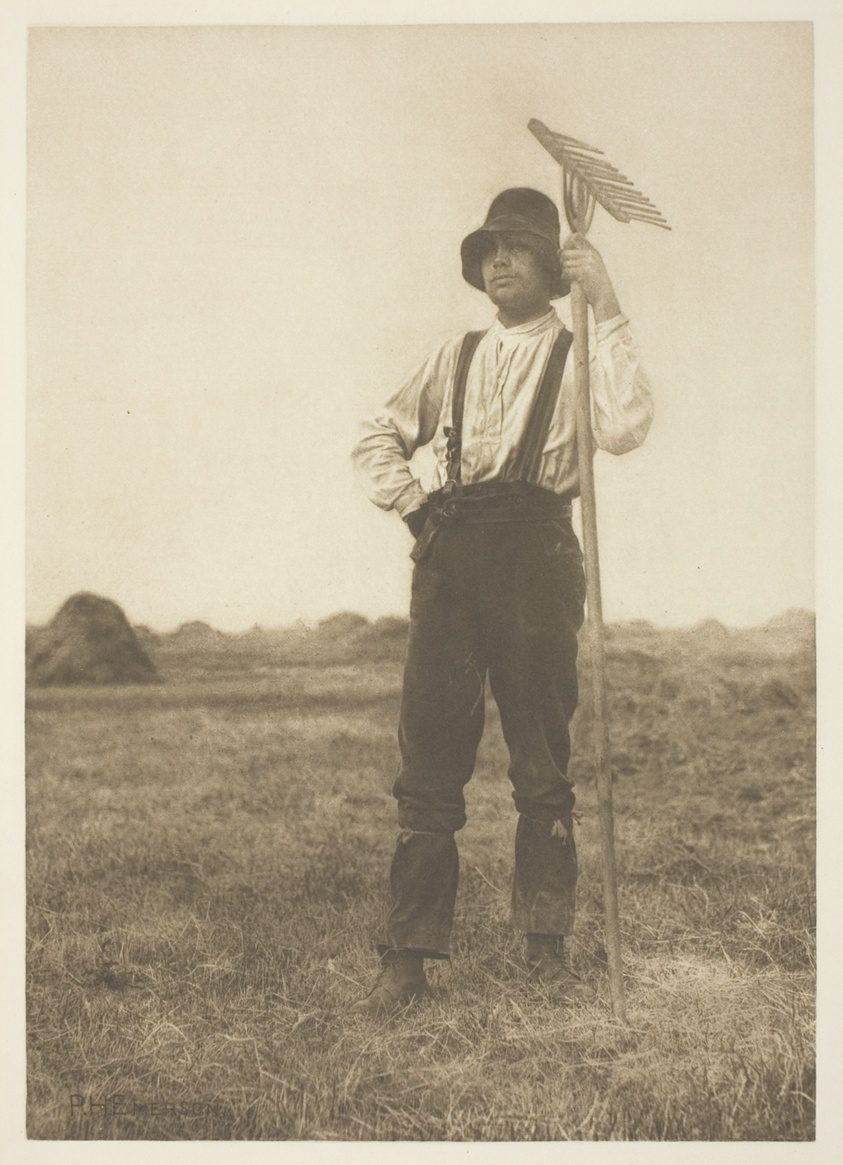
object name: Photograph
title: Haymaker with Rake (Norfolk)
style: 19th century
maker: Peter Henry Emerson (English, born Cuba, 1856–1936)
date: c. 1883/87, printed 1888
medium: Photogravure, plate XXXI from "Pictures of East Anglian Life," published by Sampson Low, Marston, Searle & Rivington (1888)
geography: England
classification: photogravure; photomechanical process; photography; photograph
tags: Collected by Hugh Edwards, Pictures of East Anglian Life, Seat of War in the Crimea